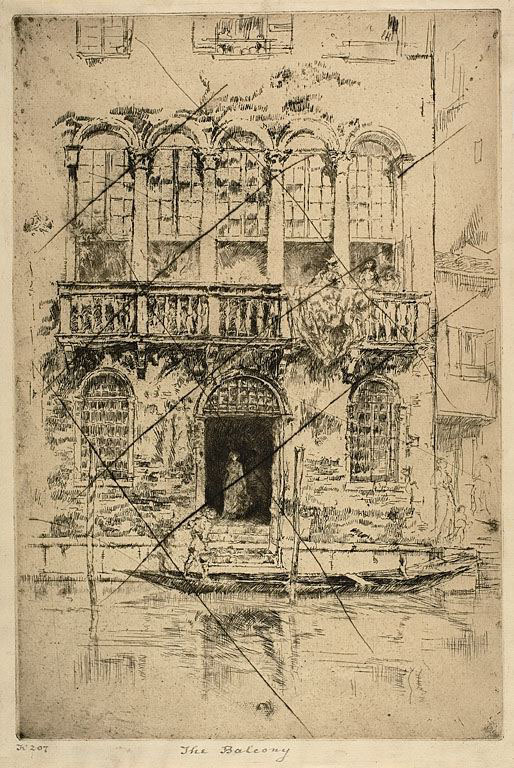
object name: Print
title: The Balcony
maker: James McNeill Whistler (American, 1834-1903)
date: 1879/80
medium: Etching and drypoint with foul biting, with drypoint cancellation, in black ink on ivory laid paper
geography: United States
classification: etching; prints and drawing; print; foul biting; drypoint; paper